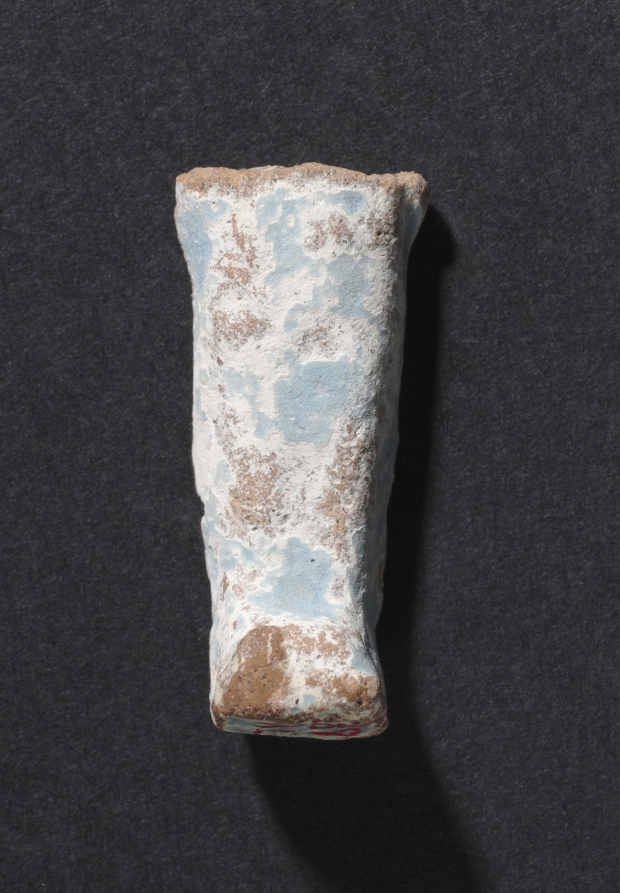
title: Shawabty of Ditamenpaankh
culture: Egypt, Late period (715–332 BCE), Dynasty 25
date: 715–656 BCE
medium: terracotta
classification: Funerary Equipment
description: High demand for shawabtys in the Late Period, a time when as many as 400 or more shawabtys were placed in the tomb with the deceased, gave rise to a specialized container for storing them: the shawabty box. This example is inscribed for the lady of the house, Ditamenpaankh, and was probably one of a pair originally made for her. The single-masted boat on the box's lid is perhaps an allusion to the pilgrimage of the deceased to the holy city of Abydos, the cult city of Osiris, king of the dead. The shawabtys inside are crude, mass-produced examples cast in an open mold. Made of terracotta, their blue paint imitates more costly shawabtys made of faience. As for the shawabty spell, it has been removed from its traditional location on the shawabty's front and relocated onto the sides of box, where it needed only to be written once, thus expediting production.